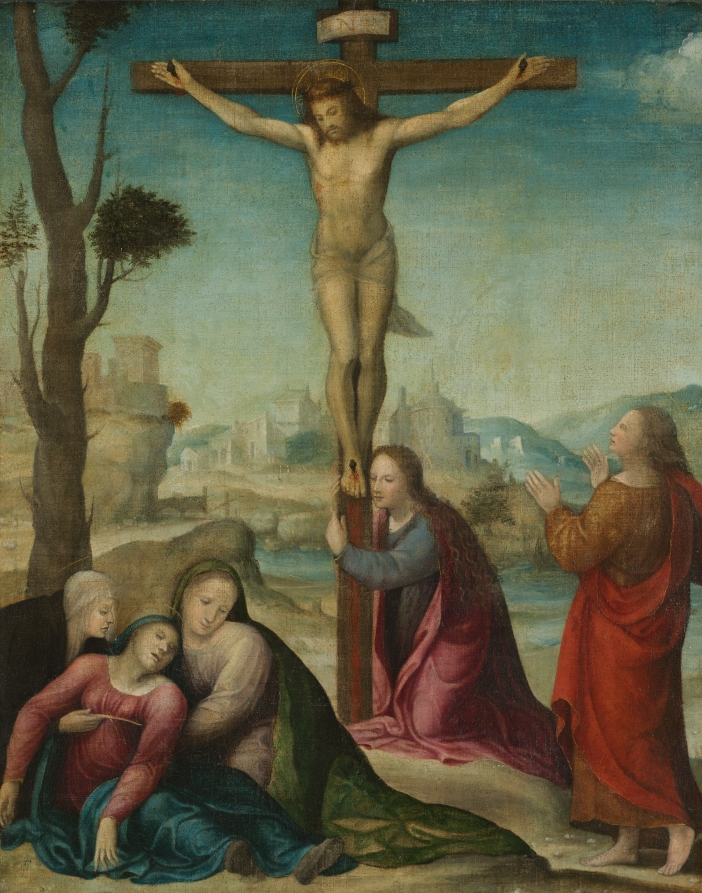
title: The Crucifixion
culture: Italy, 16th century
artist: follower of Sodoma (Italian, 1477–1549)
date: 16th century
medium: oil on canvas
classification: Painting